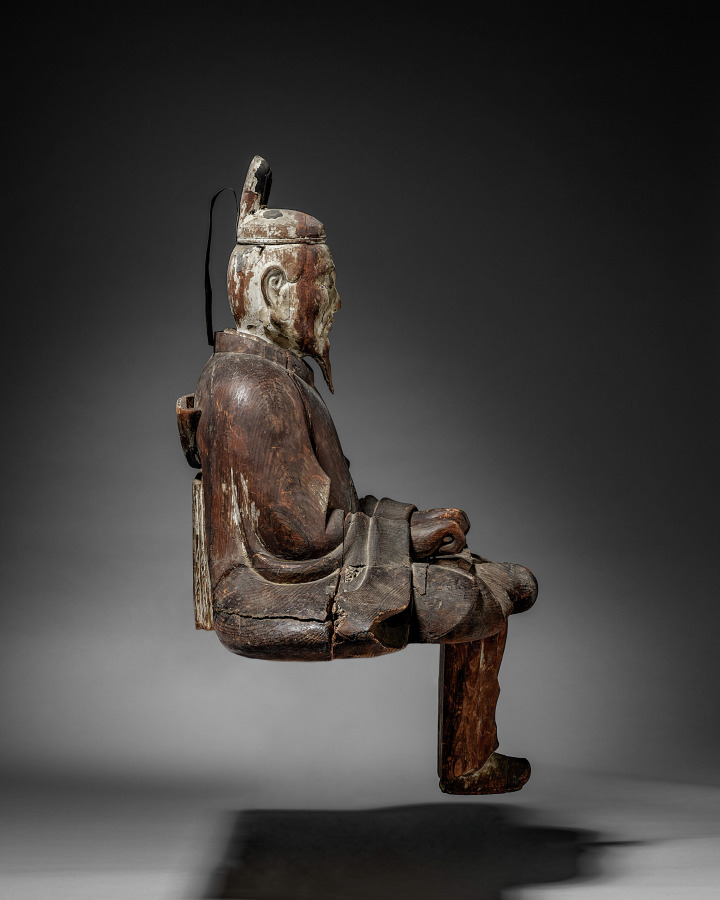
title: One of a Pair of Guardian Figures (Zuishin)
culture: Japan, Muromachi period (1392–1573) to Edo period (1615–1858)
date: c. 1560–1625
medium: Japanese cypress (hinoki) with traces of color; crystal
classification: Sculpture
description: Sculptors carved these two figures to look like members of the guard who protected the Japanese aristocracy in the 10th to 12th centuries. The pair belong in the roofed gate of a Shinto shrine. Their role was to embody the divine protectors of the deities, or kami, residing at the shrine. Their inset crystal eyes make them appear vigilant.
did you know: Some Japanese sculptors used to specialize in inset crystal eyes.